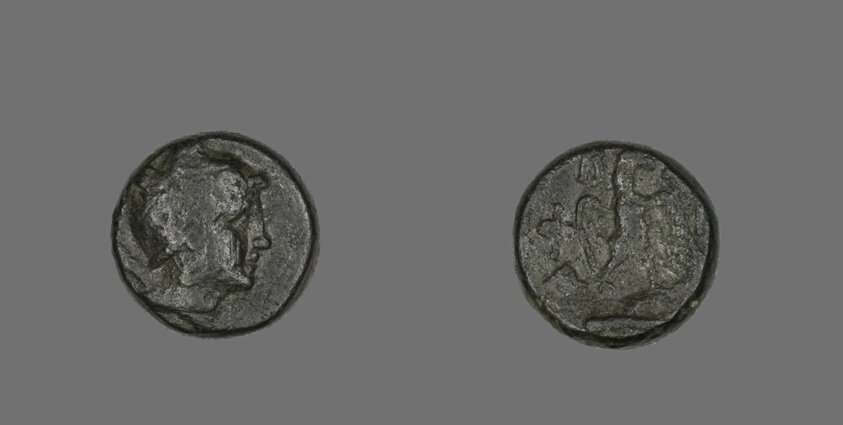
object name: Coin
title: Coin Depicting the Hero Perseus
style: greek, ancient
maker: Greek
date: 220-178 BCE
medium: Bronze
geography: Greece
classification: coin; ancient art; struck